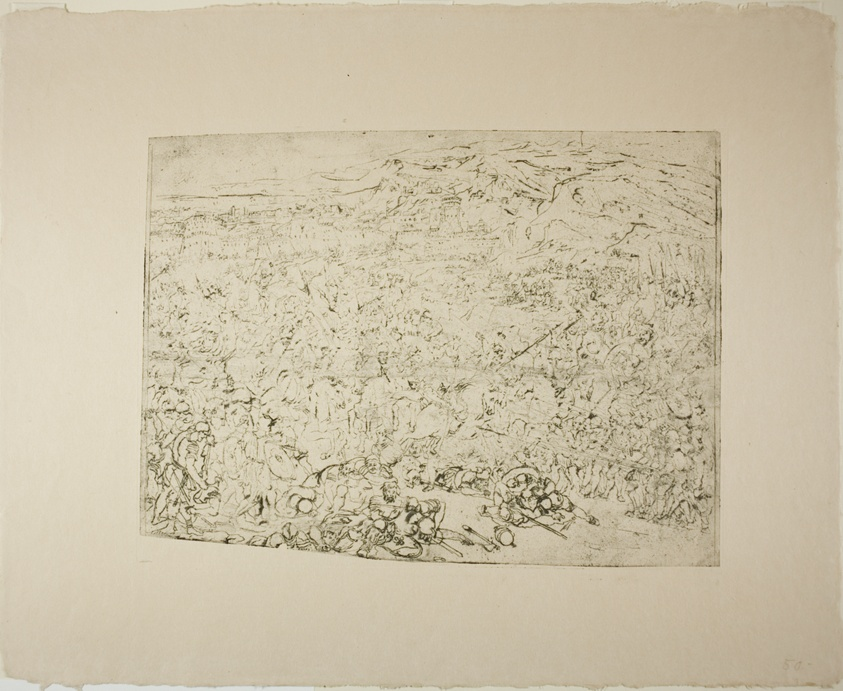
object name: Print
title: The Great Battle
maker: Rodolphe Bresdin (French, 1825-1885)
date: c. 1883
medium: Drypoint on cream Japanese paper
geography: France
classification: drypoint; print; prints and drawing